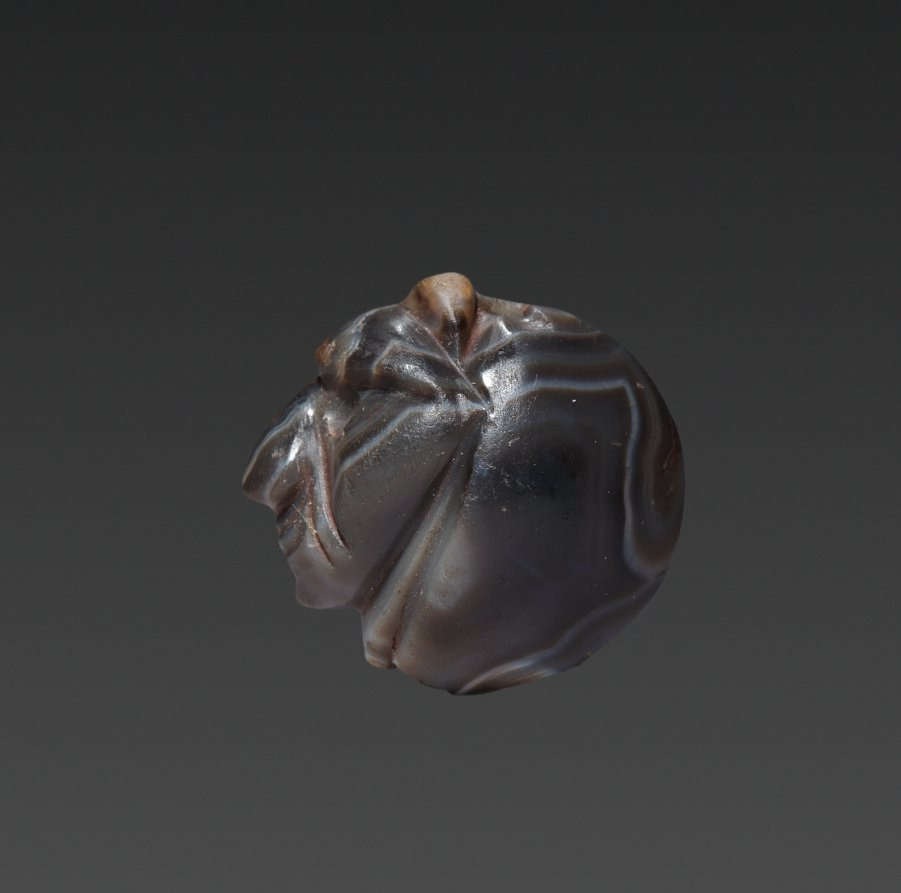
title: Seal Amulet in the form of a Lion's Head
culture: Mesopotamia, Iraq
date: 3800–3500 BCE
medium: agate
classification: Amulets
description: Delicately carved from exotic semiprecious stone, this tiny seal in the shape of a lion's head (rendered in profile) would have functioned not only as the legal signature of its ancient owner but also a protective amulet, magically conferring to its wearer the lion's natural virtues of courage, leadership, and strength.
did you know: These amulets were commonly found in tombs of women and children.